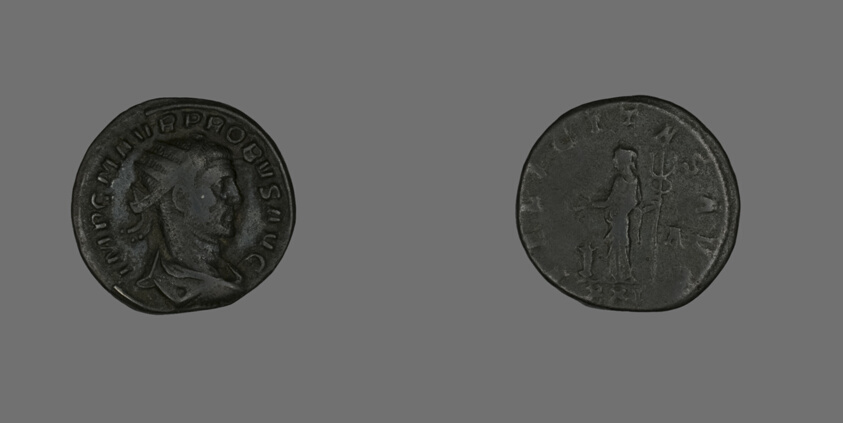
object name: Coin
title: Antoninianus (Coin) Portraying Emperor Probus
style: roman (ancient, style or period), ancient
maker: Roman, minted in Siscia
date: 276-281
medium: Billon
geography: Roman Empire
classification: coin; ancient art